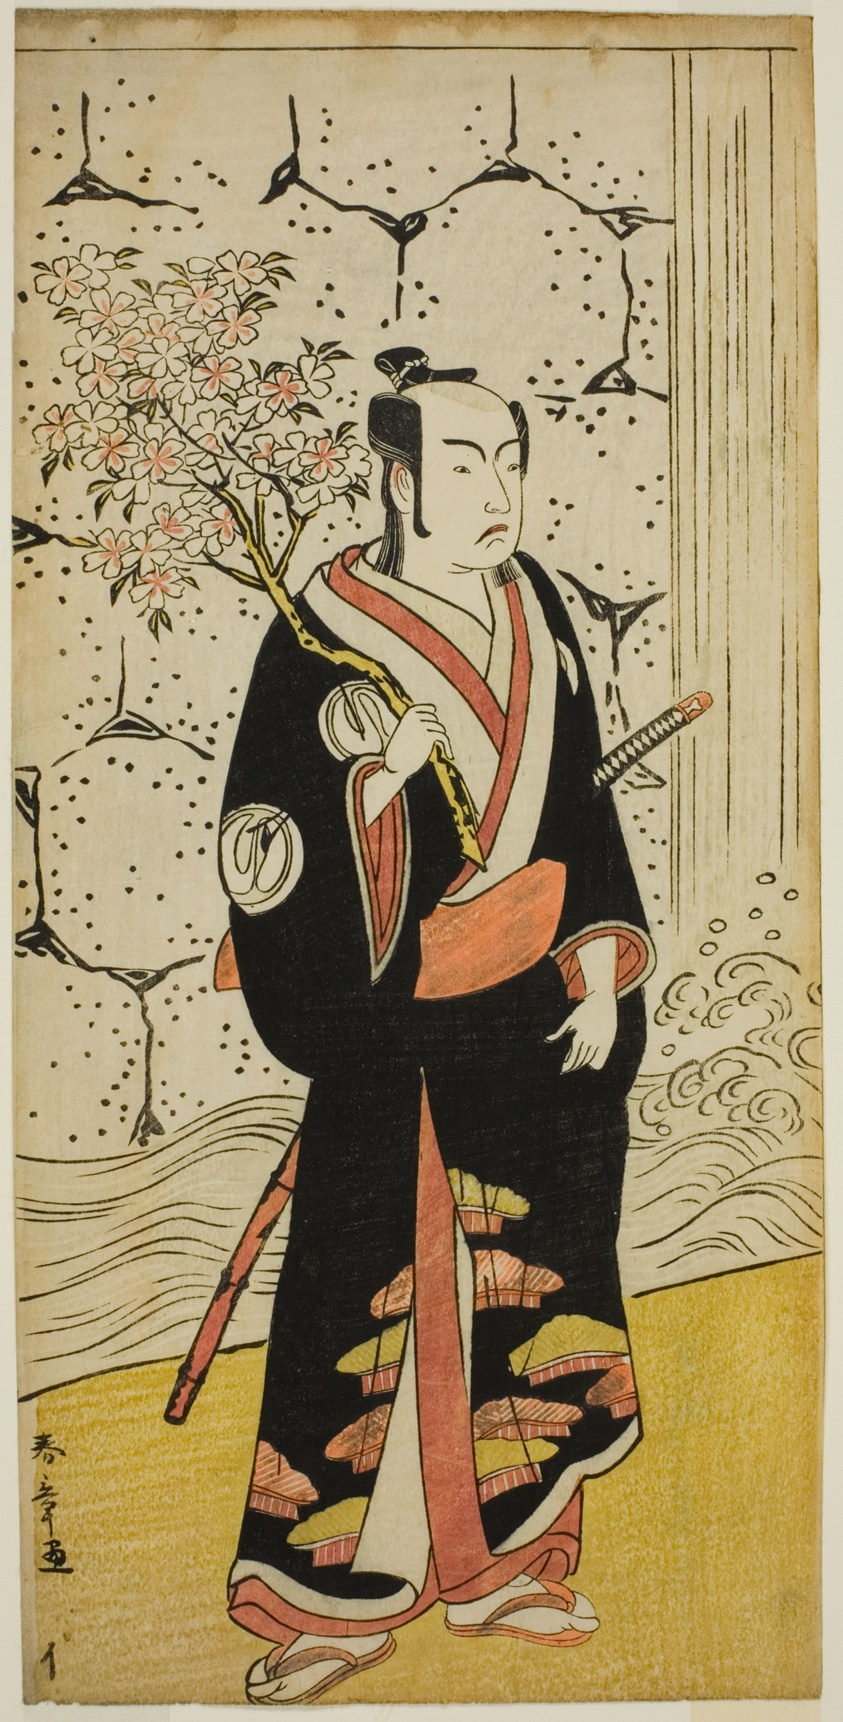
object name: Print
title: The Actor Sawamura Sojuro III as Sonobe Zaemon in the play "Shin Usuyuki Monogatari," performed at the Ichimura Theater in the eighth Month, 1779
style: Japanese (culture or style)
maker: Katsukawa Shunsho 勝川 春章; Japanese, 1726-1792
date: c. 1779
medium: Color woodblock print; left sheet of hosoban triptych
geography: Japan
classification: woodblock print; print; asian art